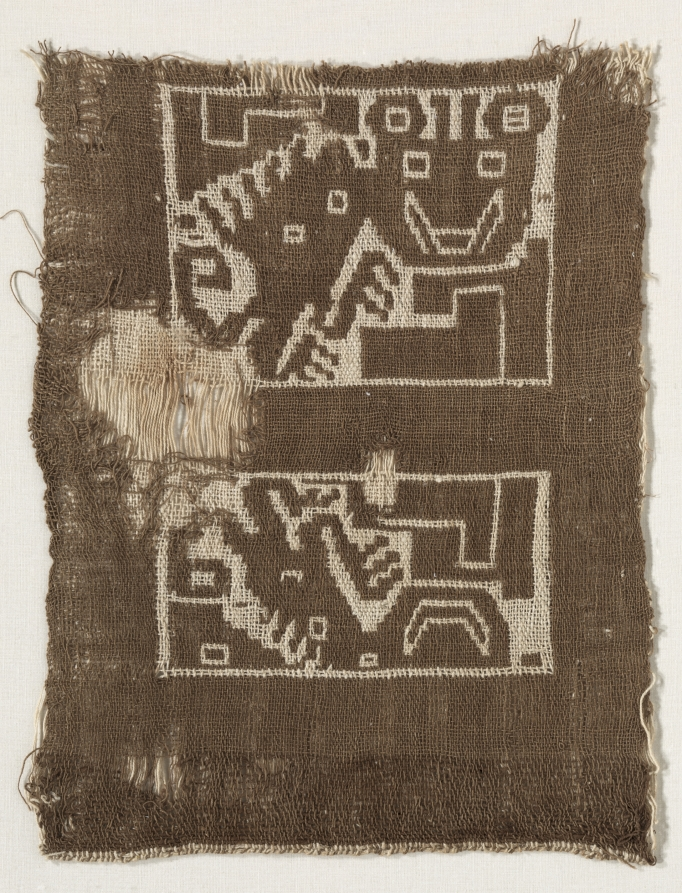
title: Fragment of a Double Cloth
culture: Peru, Central Coast, Chancay, 12th-15th century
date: c. 1100–1400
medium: tabby weave, double cloth; cotton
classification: Textile